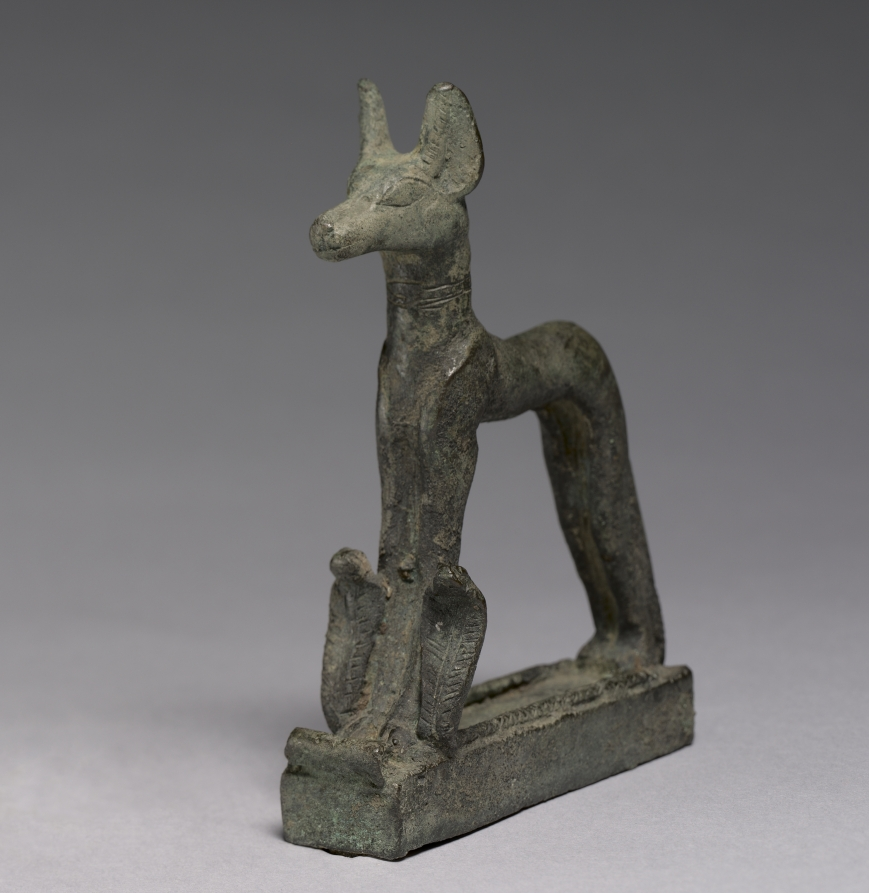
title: Jackal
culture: Egypt, Late period (715–332 BCE), Dynasty 26 or later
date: 664–30 BCE OR 664–330 BCE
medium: bronze, solid cast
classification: Sculpture